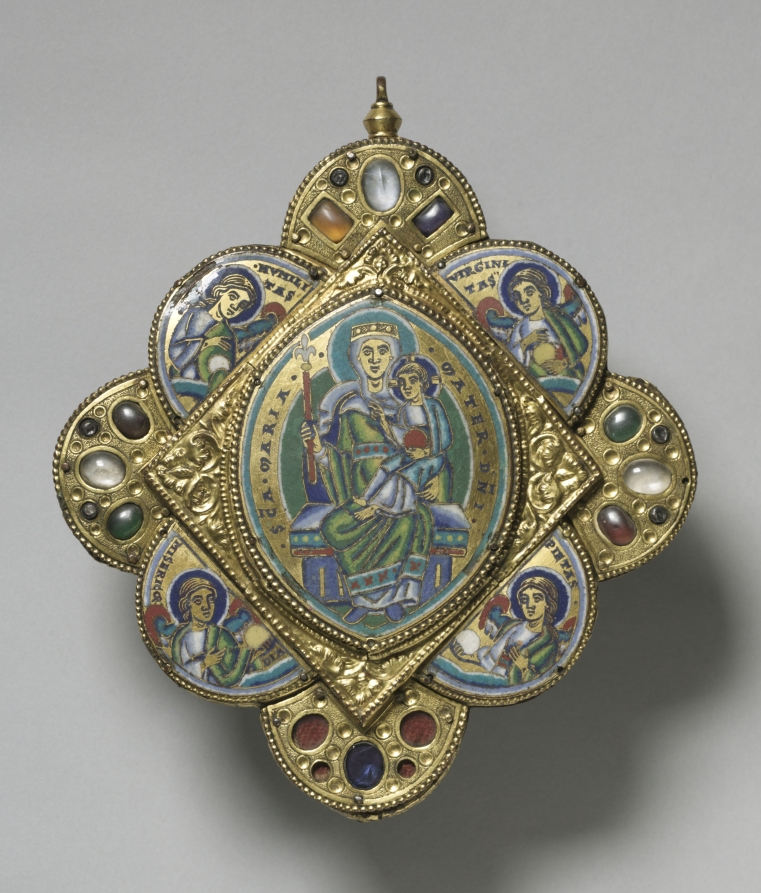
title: Pendant with the Virgin and Child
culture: Mosan, Meuse Valley, Romanesque period, 12th century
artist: circle of Godefroid de Huy (Netherlandish)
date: c. 1160–1170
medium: gilded copper, champlevé enamel; the reverse decorated in vernis brun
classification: Enamel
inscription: S[AN]C[T]A MARIA MATER D[OMI]NI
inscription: HVMILITAS; VIRGINITAS; MISERICORDIA; PIETAS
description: This pendant was made in the Rhine-Meuse region—now in modern Belgium—renowned for the production of fine metalwork objects, especially enamels. An enamel plaque depicting the enthroned Virgin and Christ child dominates the pendant. Four peripheral enamels depict angelic figures representing virtues: Humility, Virginity, Piety, and Mercy, each identified by an inscription. The pendant may have been made to serve as a reliquary to house a consecrated host. The refined craftsmanship and costly materials fittingly honor these sacred remains.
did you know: The outer lobes contain cabochons, gemstones that have been shaped and polished resulting in a rounded top and flat bottom, of garnet, glass, and quartz.